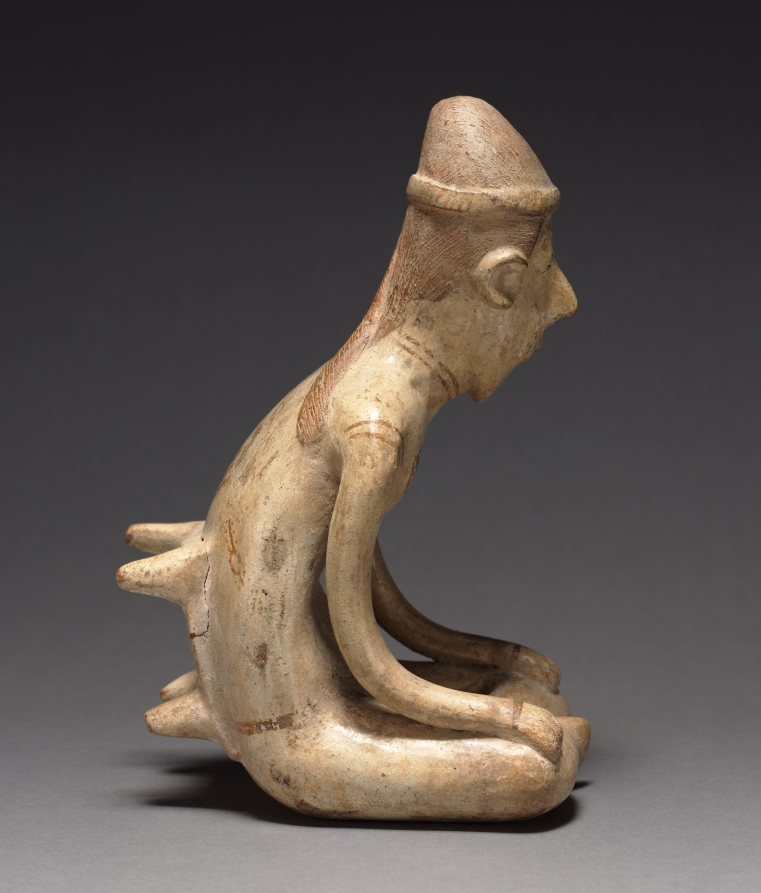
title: Seated Male Figure with Backrest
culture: Mexico, Nayarit, Chinesco style, Type E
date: 100 BCE–300 CE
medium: pottery with burnished cream and red slips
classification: Sculpture